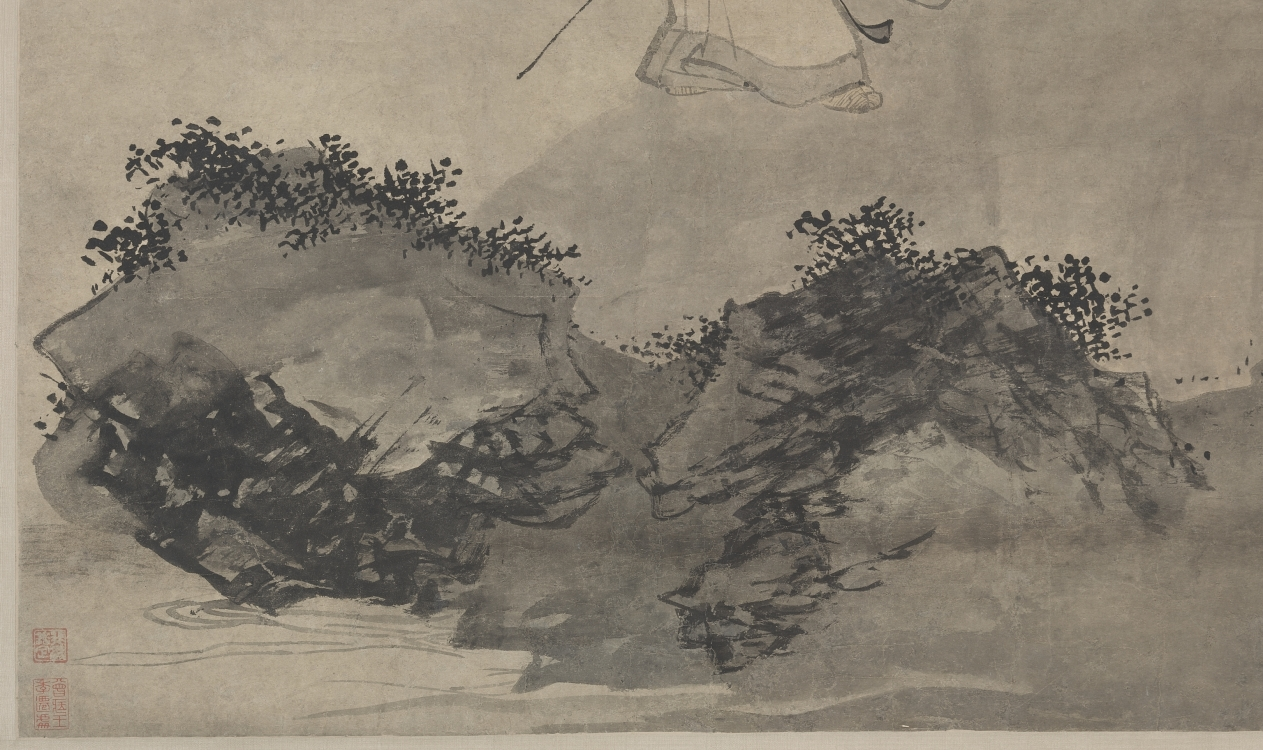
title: The Poet Lin Bu Wandering in the Moonlight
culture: China, Ming dynasty (1368–1644)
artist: Du Jin (Chinese, 1446-c. 1519)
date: late 1400s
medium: Hanging scroll; ink and color on paper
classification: Painting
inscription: 陪月閒行杖屨遲，半醒時節更相宜。 吟成疏影寒香句，為問梅花知不知。 檉居杜堇 [印]一書生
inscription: 1 seal of Zhang Heng 張珩 (1915–1963)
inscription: 1 seal of C. C. Wang [Wang Jiqian] 王季遷 (1907–2003)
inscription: 1 unidentified seal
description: Lin Bu (967–1028), a Northern Song (960–1127) poet and hermit who lived at the West Lake in Hangzhou, was known for having plum trees for his female companions and cranes for his children. This hanging scroll depicts the poet walking in the moonlight and looking at the plum tree, a scene described in his most well-known poem on plum blossoms. Surviving works signed by Du Jin are rare and this painting is one of them. Here, the artist used lively brushwork to depict the plum tree and rocks, exemplified in varying dots and strokes, and sweeps in different shades of ink.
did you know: Lin Bu withdrew from prestigious government service and lived as a hermit by the West Lake in Hangzhou.